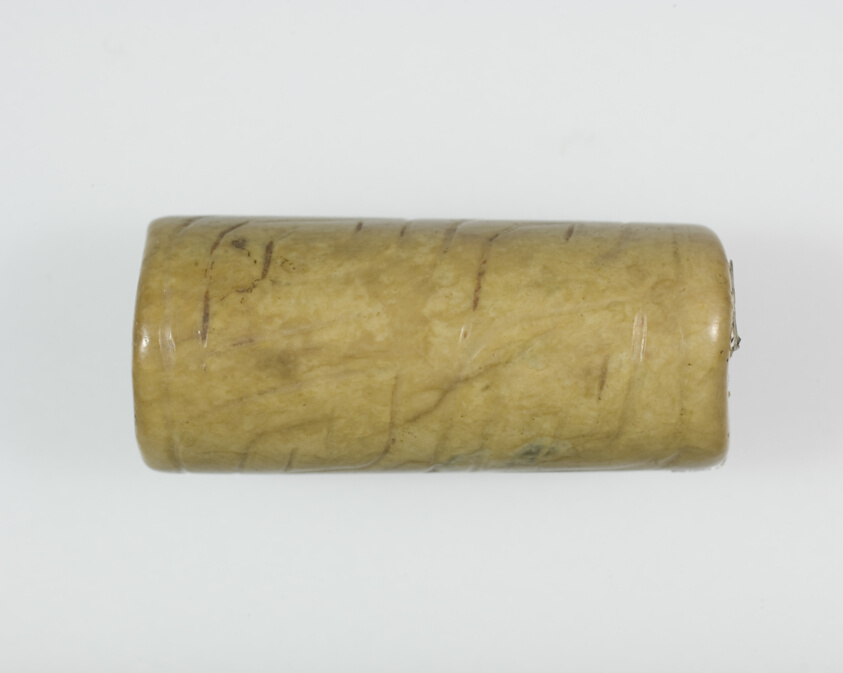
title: Bead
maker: China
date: Early Western Zhou dynasty (1047BC-772BC)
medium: Jade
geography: China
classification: jade; asian art